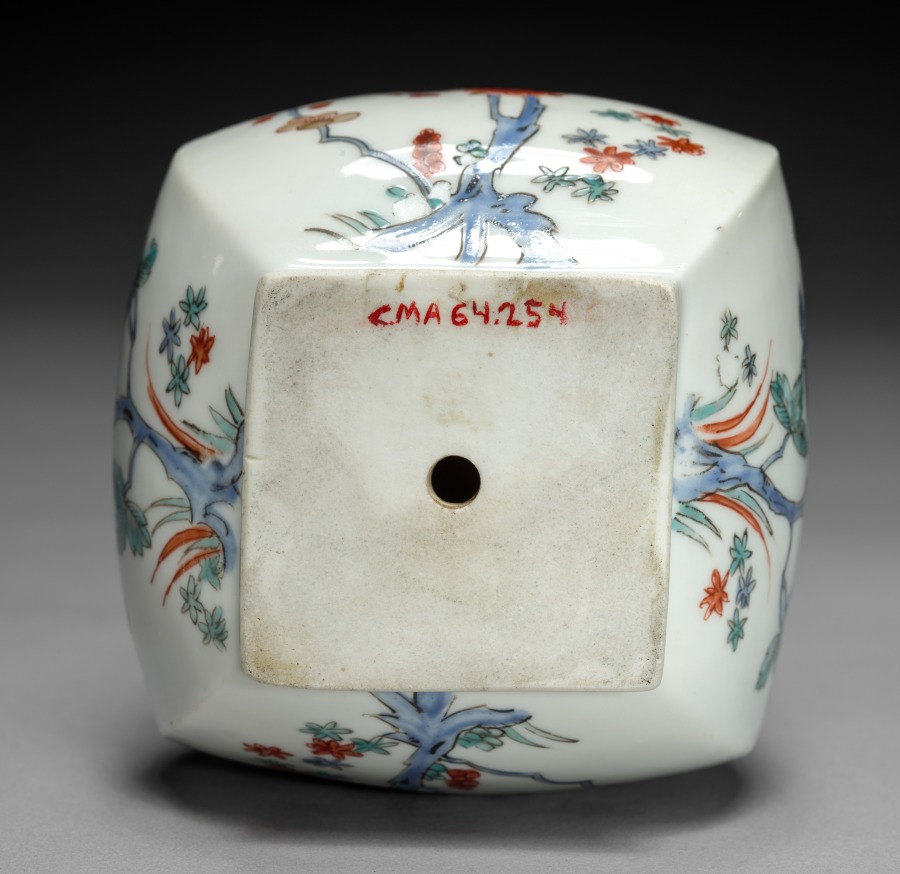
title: Bottle Vase with Plum and Chrysanthemum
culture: Japan, Edo period (1615–1868)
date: late 1600s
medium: porcelain with overglaze color enamel and gold (Hizen ware, Kakiemon type)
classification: Ceramic